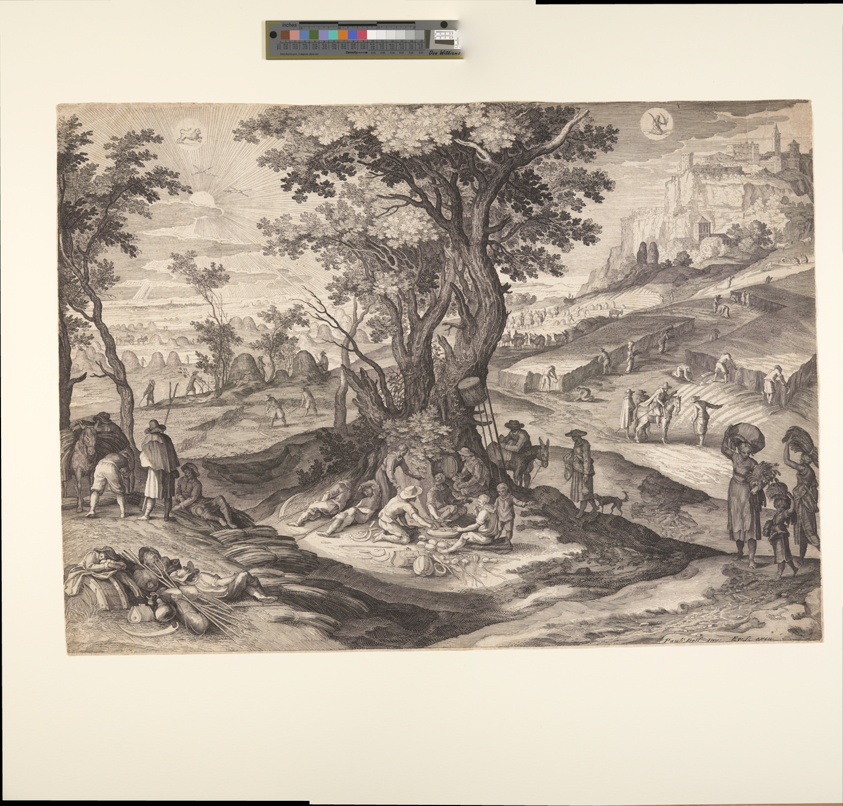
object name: Print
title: July/August, from The Twelve Months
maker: Aegidius Sadeler II (Flemish, c. 1570–1629); after Paul Bril (Flemish, 1554–1626)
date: c. 1615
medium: Engraving on ivory laid paper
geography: Flanders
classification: engraving; paper; print; prints and drawing